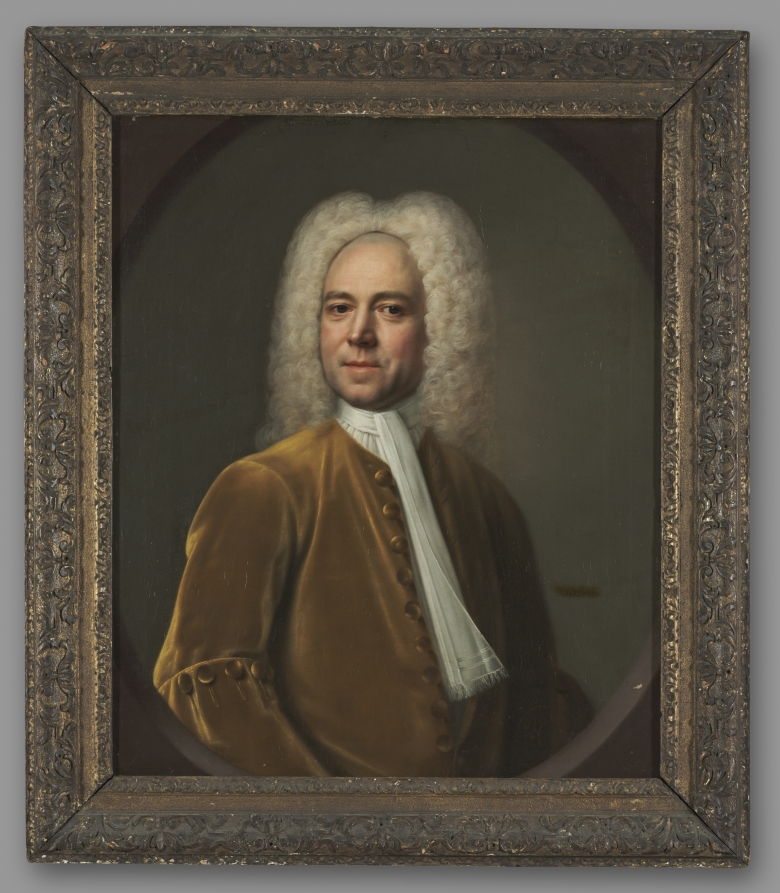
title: Portrait of a Man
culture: England, 18th century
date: c. 1730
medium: oil on canvas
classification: Painting